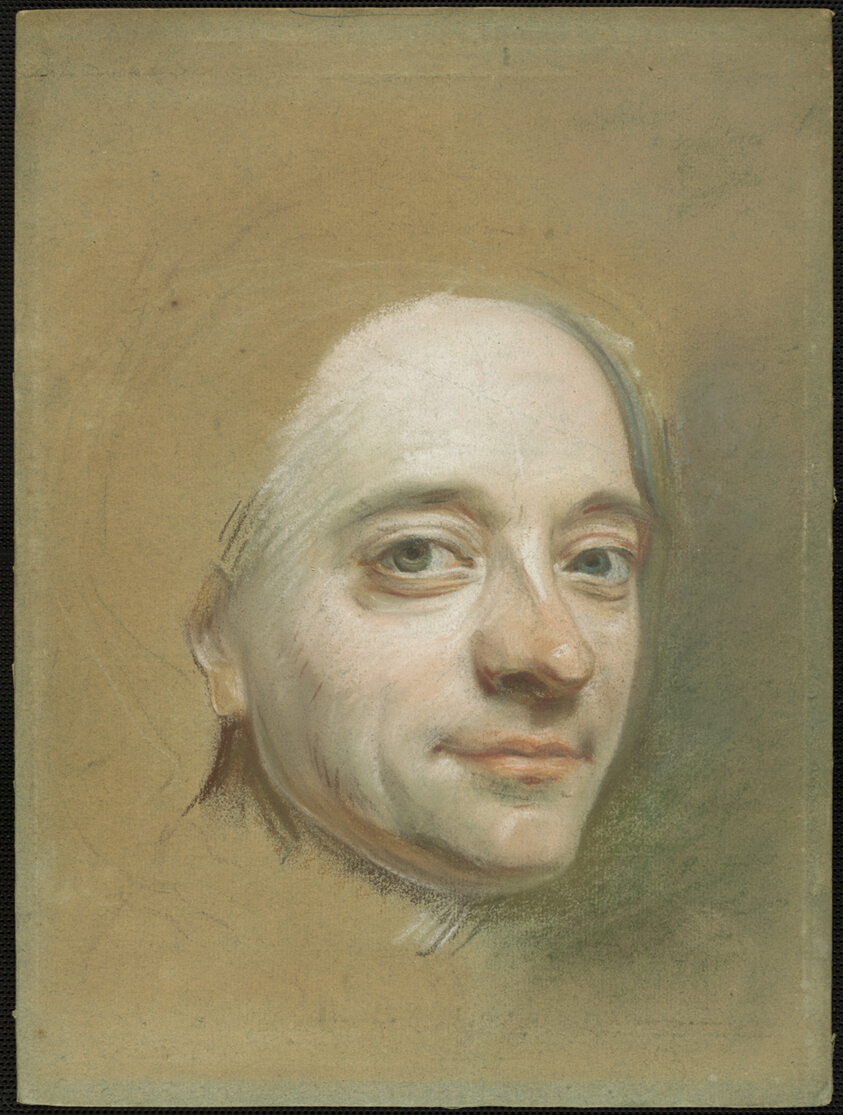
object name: Drawing and Watercolor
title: Self-Portrait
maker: Maurice Quentin de Latour (French, 1704-1788)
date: c. 1737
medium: Pastel on greenish-tan laid paper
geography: France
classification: pastel; drawings (visual works); prints and drawing